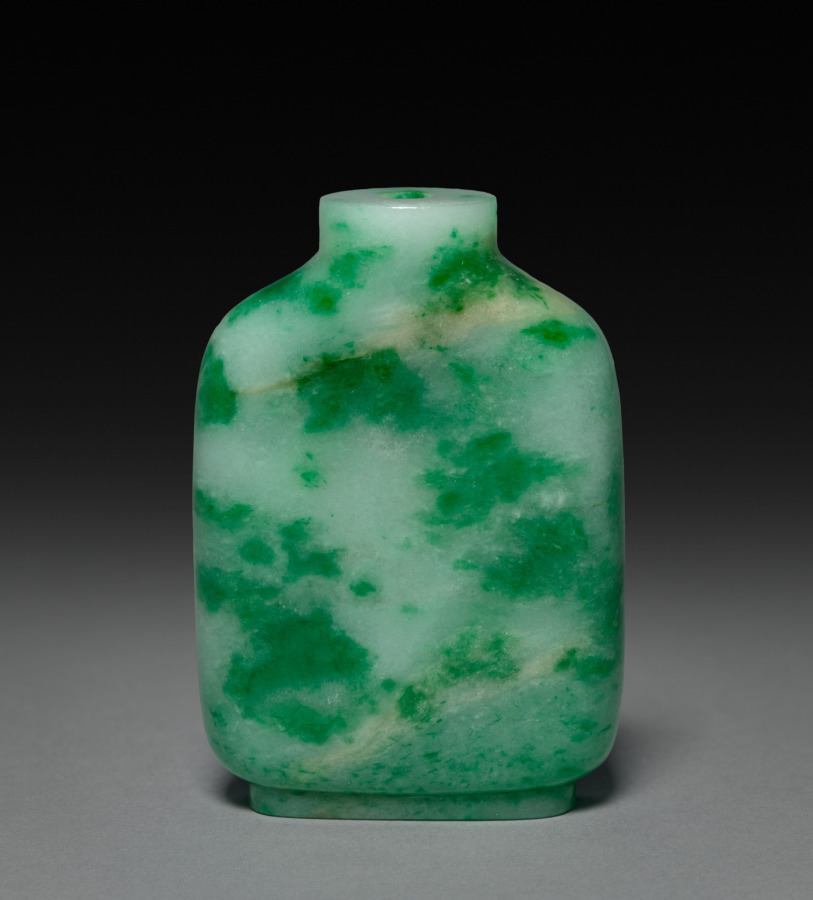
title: Snuff Bottle with Stopper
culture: China, Qing dynasty (1644-1911)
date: 1800s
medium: jade and rose quartz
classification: Jade